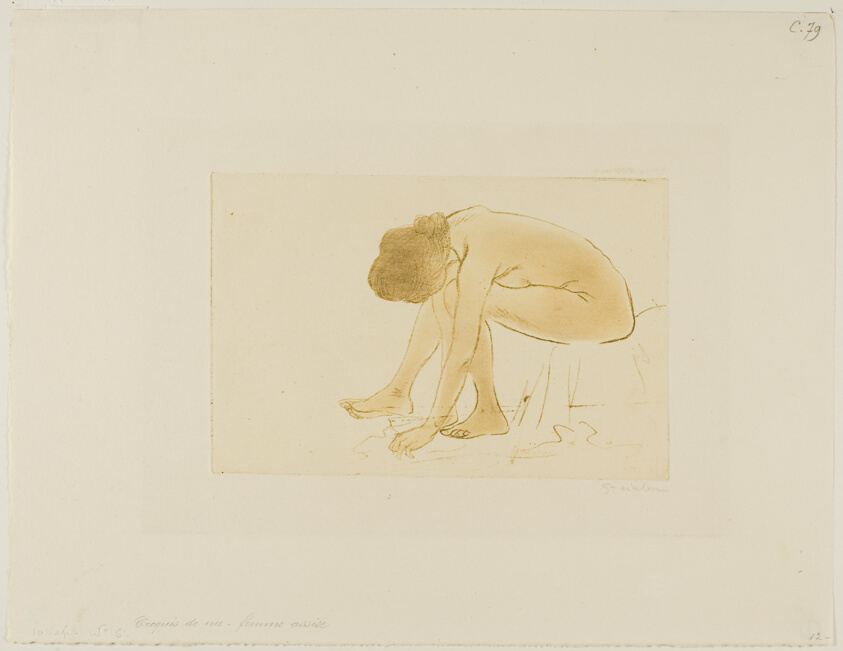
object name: Print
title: Seated Woman Wiping Her Feet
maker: Théophile-Alexandre Steinlen; French, born Switzerland, 1859-1923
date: May 1902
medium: Aquatint and softground etching from a zinc plate in bistre (brown) on ivory wove paper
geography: France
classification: aquatint; print; prints and drawing